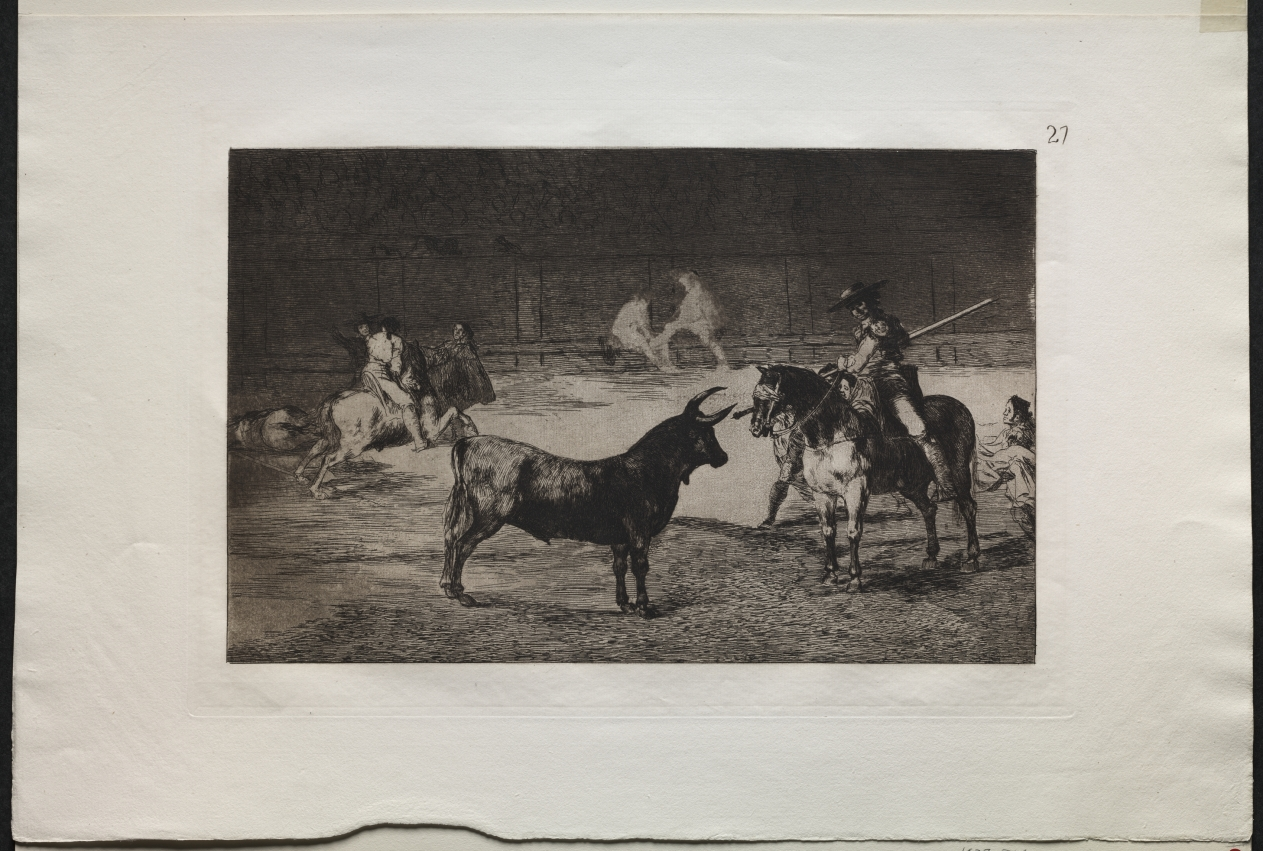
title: Bullfights: The Celebrated Picador, Fernando del Toro, Draws the Fierce Beast on with his Pique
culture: Spain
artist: Francisco de Goya (Spanish, 1746–1828)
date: 1816, printed 1876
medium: engraving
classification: Print